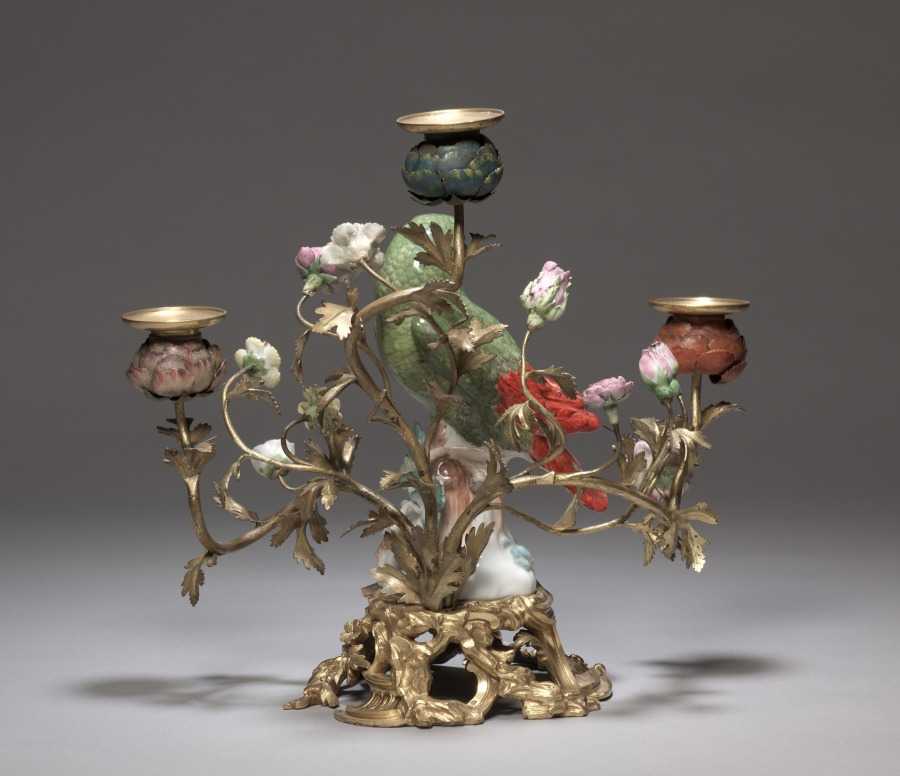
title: Candelabrum with Parrot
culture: Germany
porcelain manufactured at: Meissen Porcelain Factory (German, est. c. 1710)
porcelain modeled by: Johann Joachim Kändler (German, 1706–1768)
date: c. 1740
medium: porcelain mounted in gilt bronze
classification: Ceramic